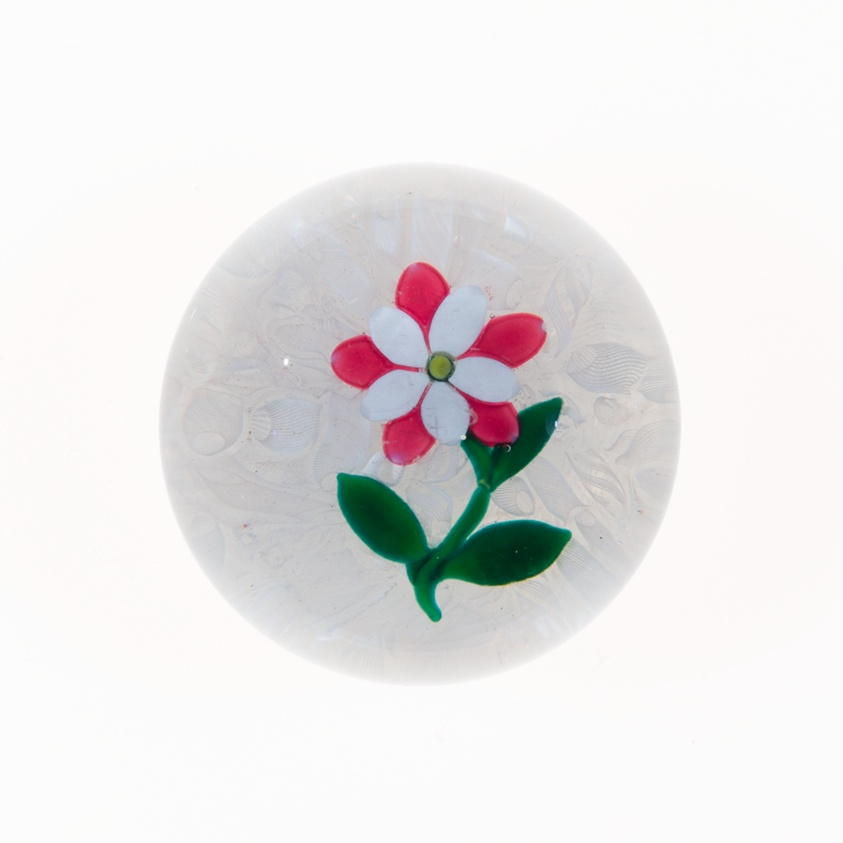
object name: Glass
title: Paperweight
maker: Possibly France or United States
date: Late 19th century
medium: Glass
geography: France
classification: paperweight; glass